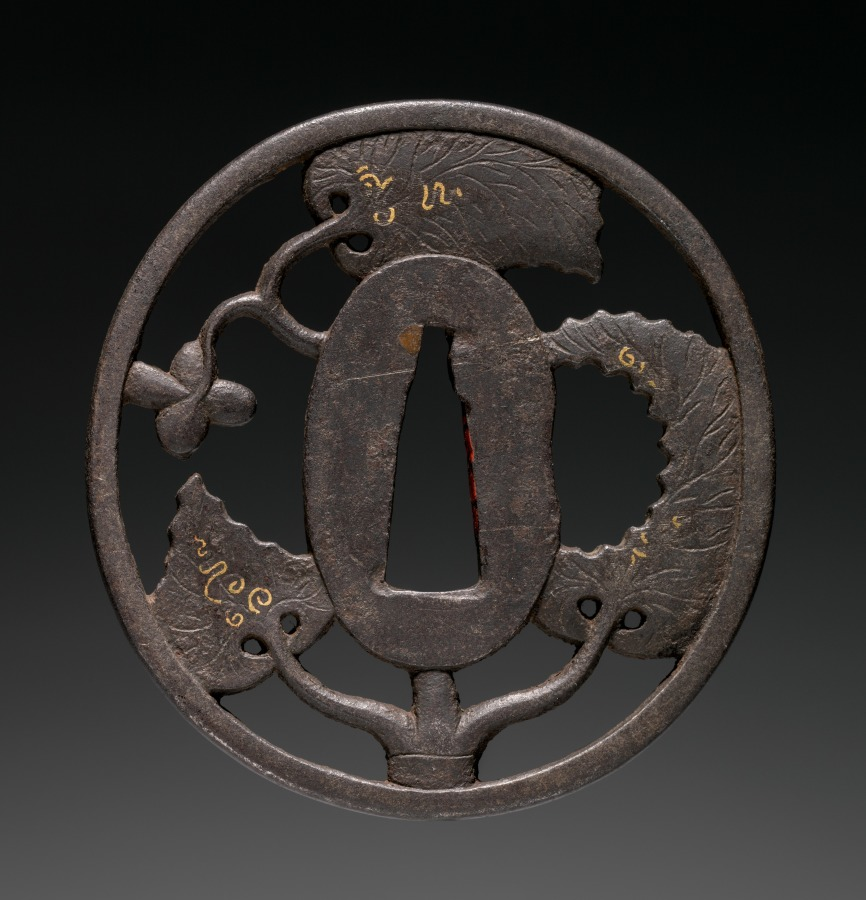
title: Sword Guard (Tsuba) with Flowering Vine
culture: Japan, Edo period (1615–1868)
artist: Masakata (Japanese)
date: c. 1815–50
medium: iron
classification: Arms and Armor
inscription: Signature: Masakata